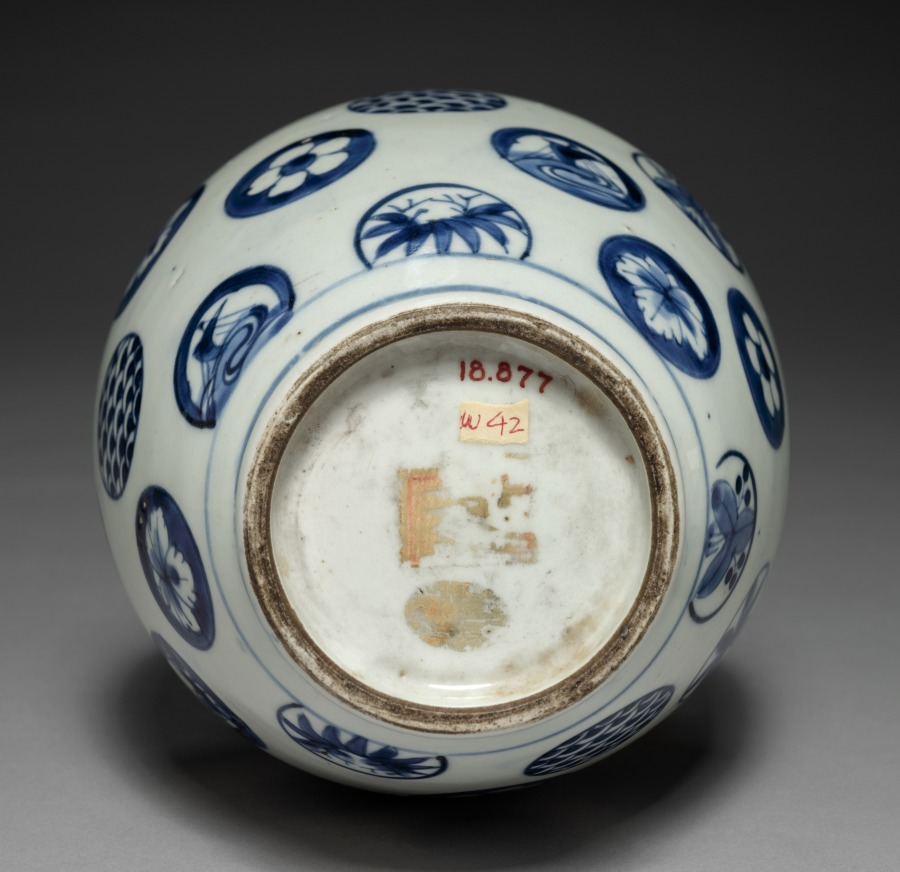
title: Jar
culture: Japan, Edo period (1615–1868)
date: early to mid-1800s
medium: porcelain with underglaze blue (Hizen ware, Arita type, Imari style)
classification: Ceramic